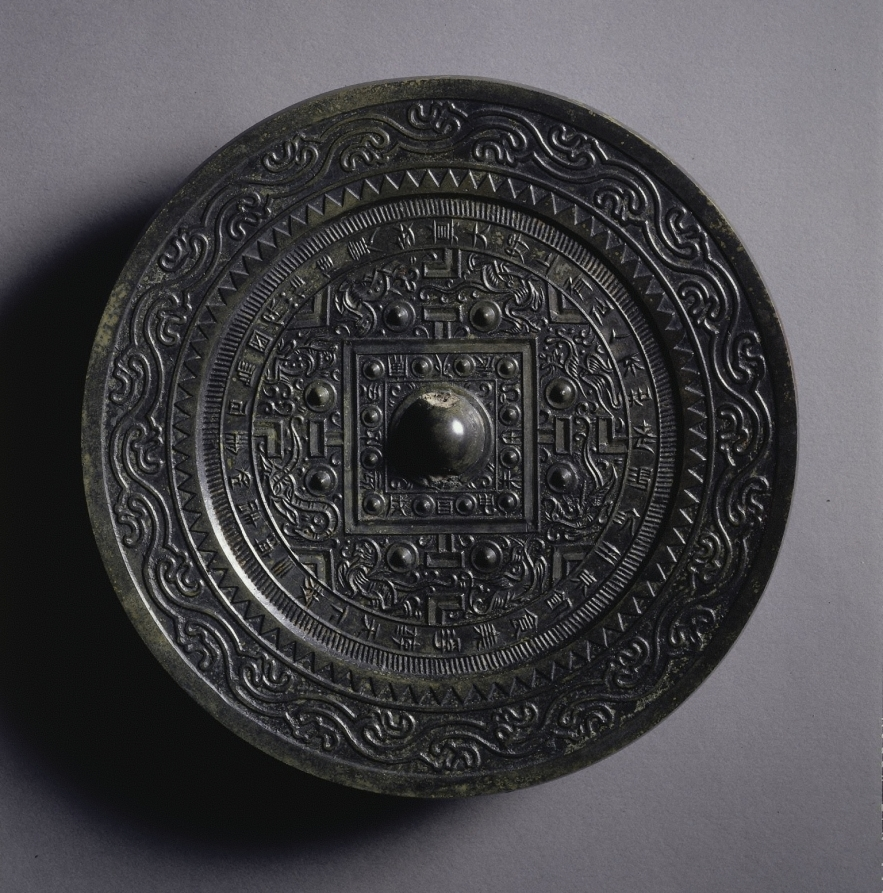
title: TLV Mirror with Multiple Nipples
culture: China, Xin dynasty (9–23 CE)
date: 9–23 CE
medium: bronze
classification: Metalwork